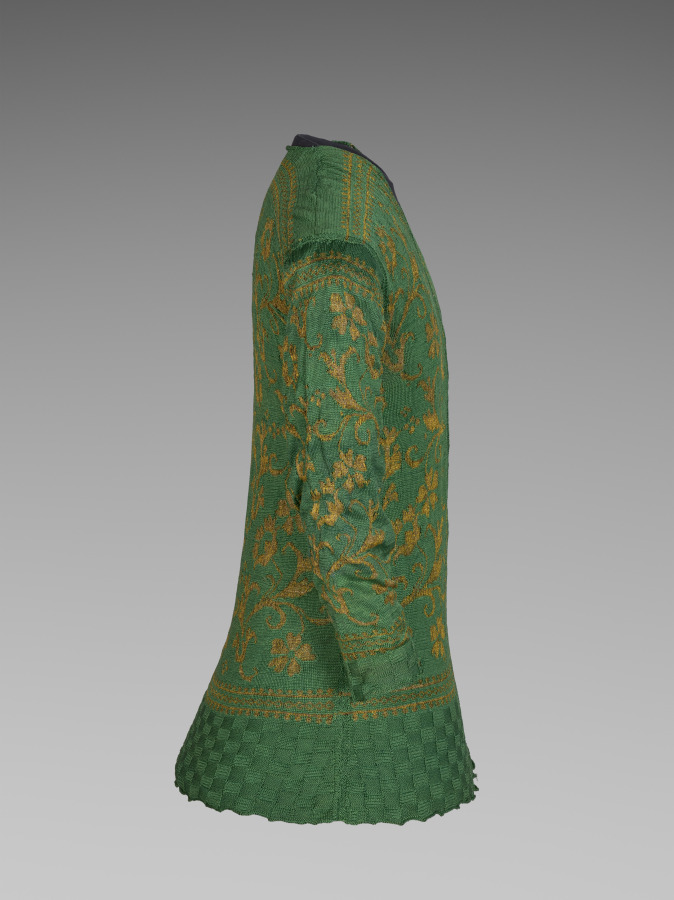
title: Knitted Hunting Jacket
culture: Italy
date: 1600s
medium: knitted silk with gold thread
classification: Garment